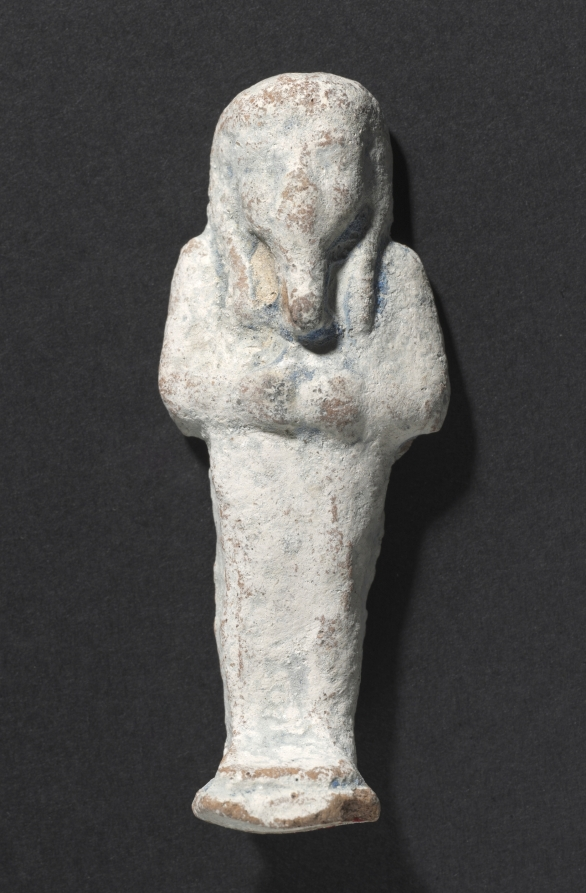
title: Shawabty of Ditamenpaankh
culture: Egypt, Late period (715–332 BCE), Dynasty 25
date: 715–656 BCE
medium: terracotta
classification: Funerary Equipment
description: High demand for shawabtys in the Late Period, a time when as many as 400 or more shawabtys were placed in the tomb with the deceased, gave rise to a specialized container for storing them: the shawabty box. This example is inscribed for the lady of the house, Ditamenpaankh, and was probably one of a pair originally made for her. The single-masted boat on the box's lid is perhaps an allusion to the pilgrimage of the deceased to the holy city of Abydos, the cult city of Osiris, king of the dead. The shawabtys inside are crude, mass-produced examples cast in an open mold. Made of terracotta, their blue paint imitates more costly shawabtys made of faience. As for the shawabty spell, it has been removed from its traditional location on the shawabty's front and relocated onto the sides of box, where it needed only to be written once, thus expediting production.